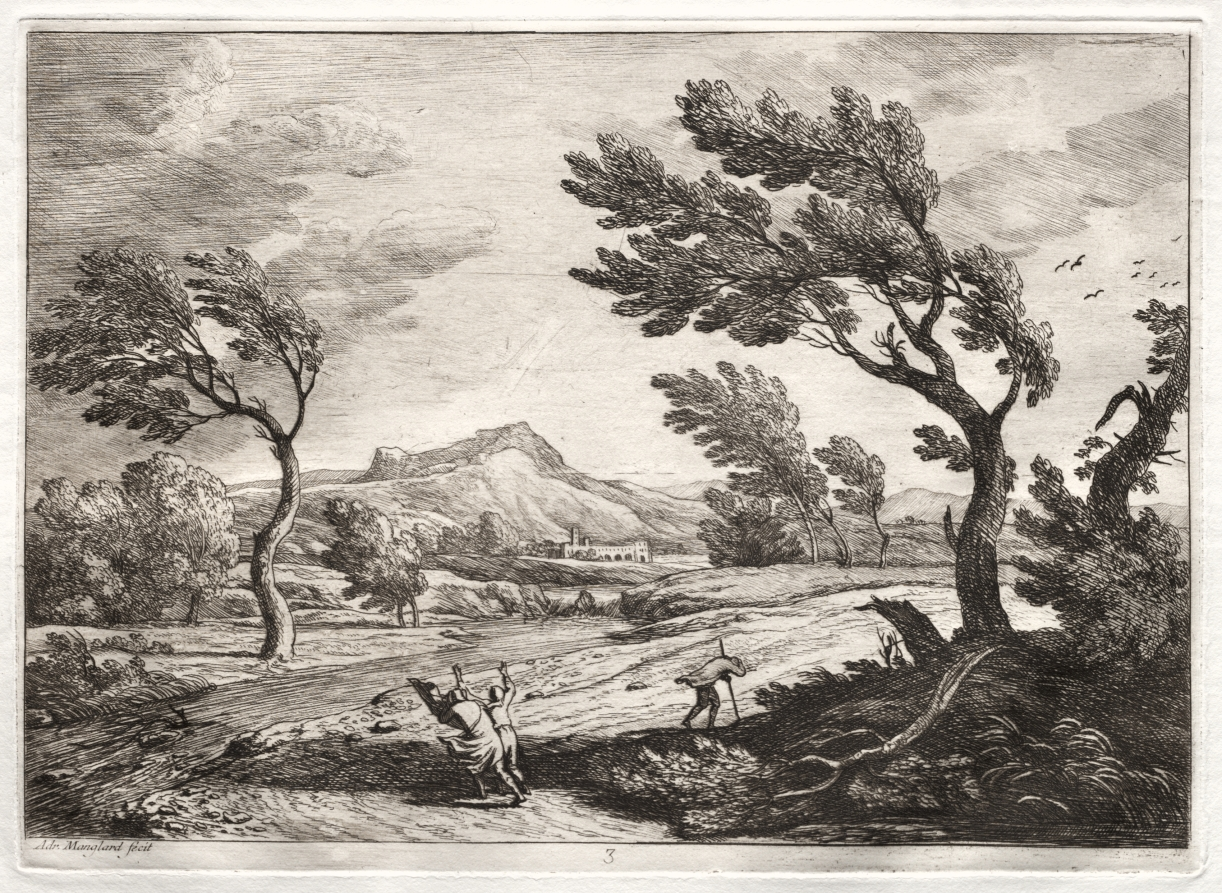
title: Landscape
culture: France, 18th century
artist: Adrien Manglard (French, 1695–1760)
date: c. 1753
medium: intaglio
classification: Print